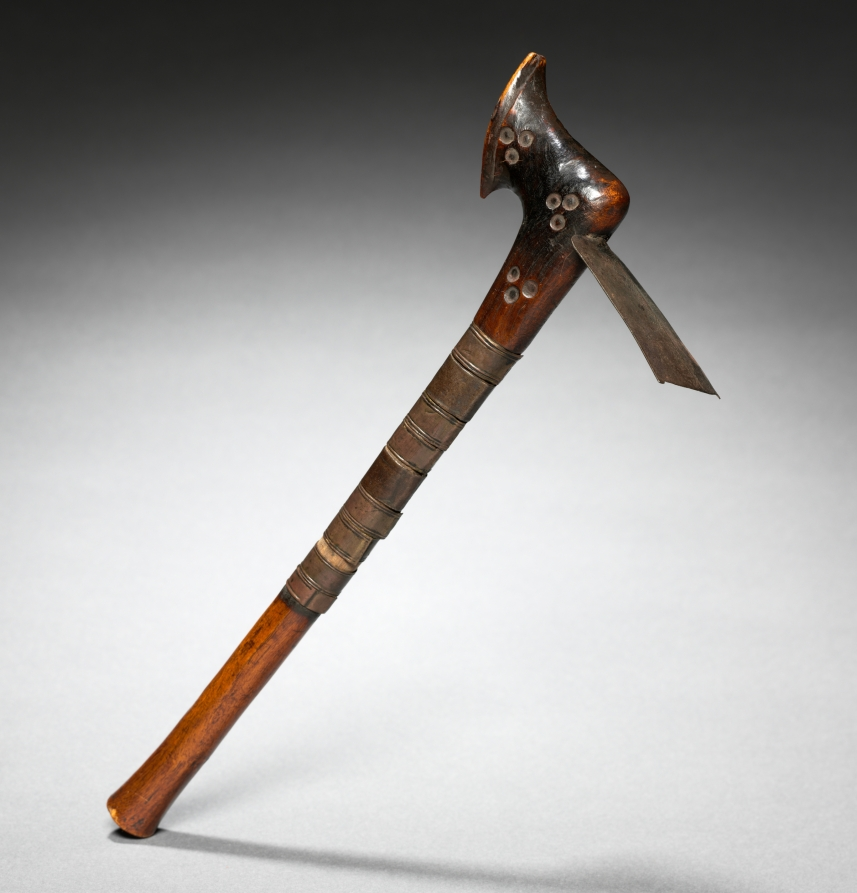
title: Ceremonial Hoe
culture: Africa, Southern Africa, South Africa, possibly Zulu-style maker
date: early 1900s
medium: Wood and copper alloy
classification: Implements